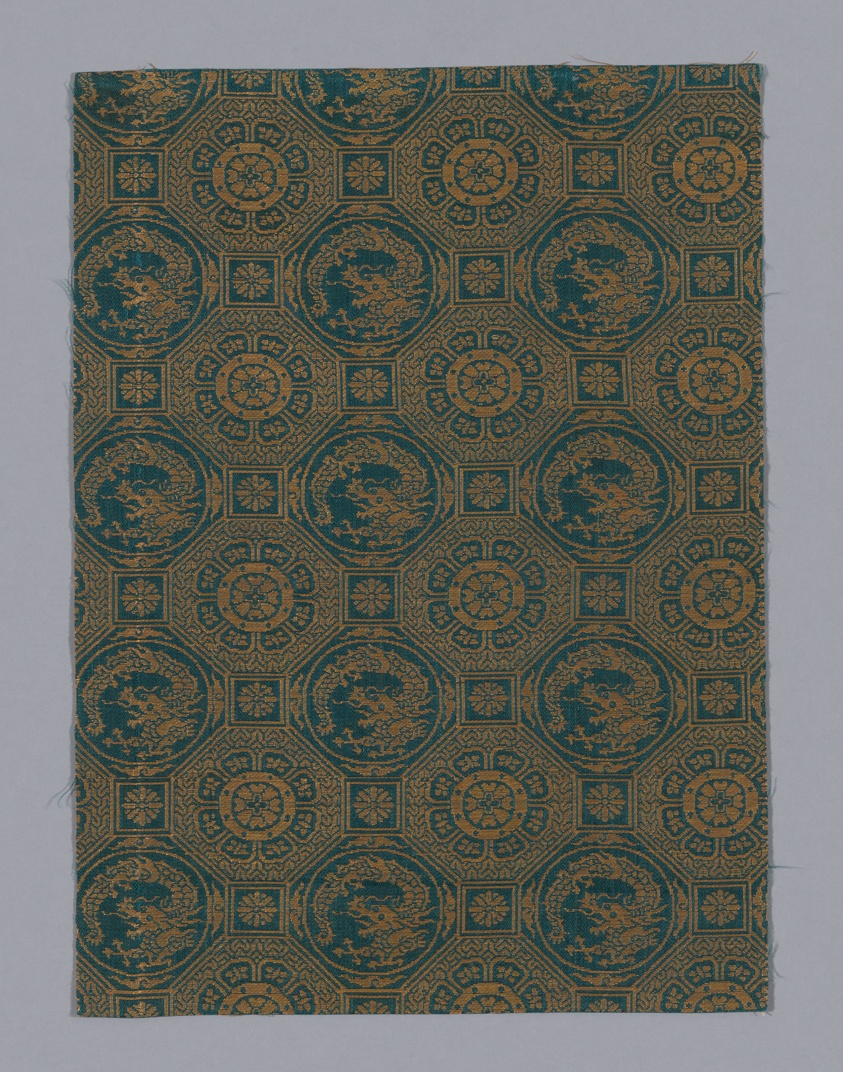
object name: Textile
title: Fragment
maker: Japan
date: Edo period (1615– 1868), 1725/1775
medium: Plain compound twill, silk and gilt paper; 3 strips to m.m.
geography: Japan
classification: textile; weaving